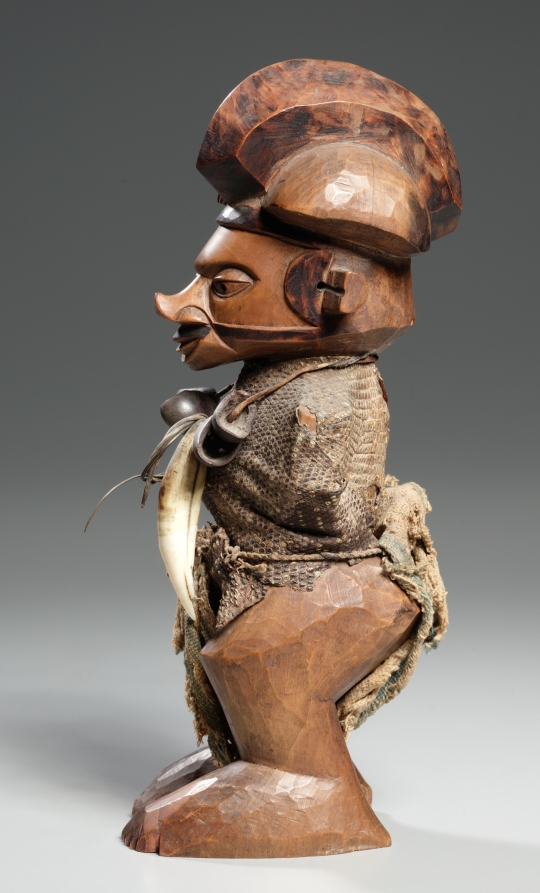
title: Figure (kiteki)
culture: Africa, Central Africa, Democratic Republic of Congo, Yaka-style carver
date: late 1800s–mid-1900s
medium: Wood, lizard skin, leopard tooth, pods, cloth, and natural fiber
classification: Sculpture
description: Biteki is the generic name for Yaka figures used as containers for magical ingredients. After being charged by a ritual specialist, they become minkisi, or power objects, and gain the power to either cure or harm. This example, with various leadership accouterments, likely belongs to the category called phuungu. Placed inside a house, the statuette would have protected against witches and other evil.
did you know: The sculptures and the specially selected materials inside assist the prayers of owners for protection from harm, sickness, or loss.